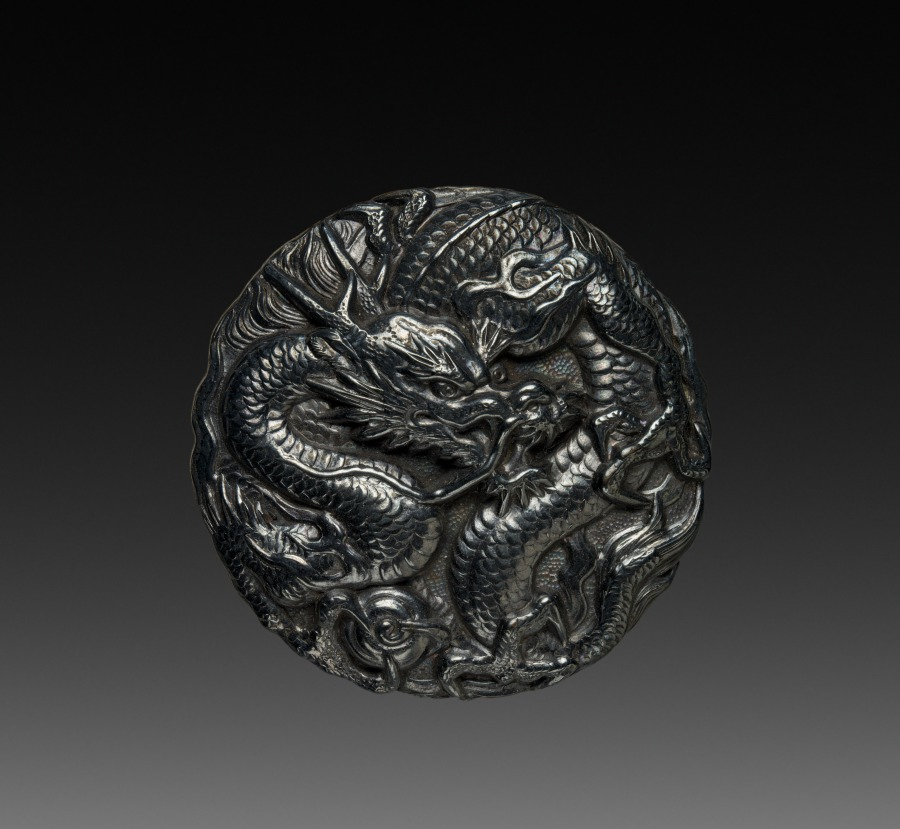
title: Button with Dragon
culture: Japan, Meiji period (1868–1912) to Taishō period (1912–26)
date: early 1900s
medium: One of a set of five buttons; cast (?) silver with relief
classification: Metalwork